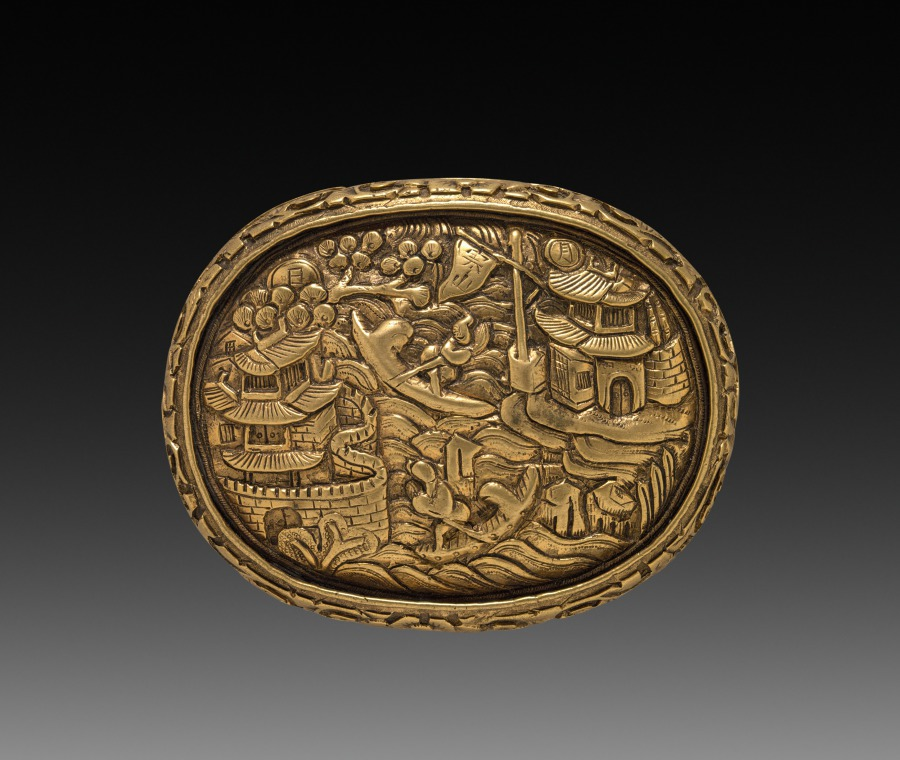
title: Buckle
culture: China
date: 1900s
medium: brass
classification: Jewelry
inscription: 日, 月